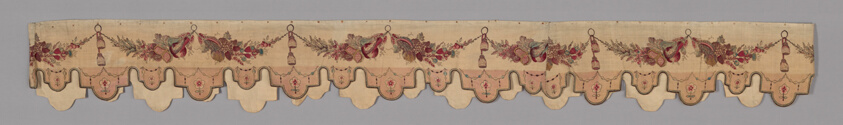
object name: Textile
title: Canopy for Bed Set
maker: France, Nantes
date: 18th century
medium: Cotton, plain weave; block printed and painted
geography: France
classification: textile; weaving - printed